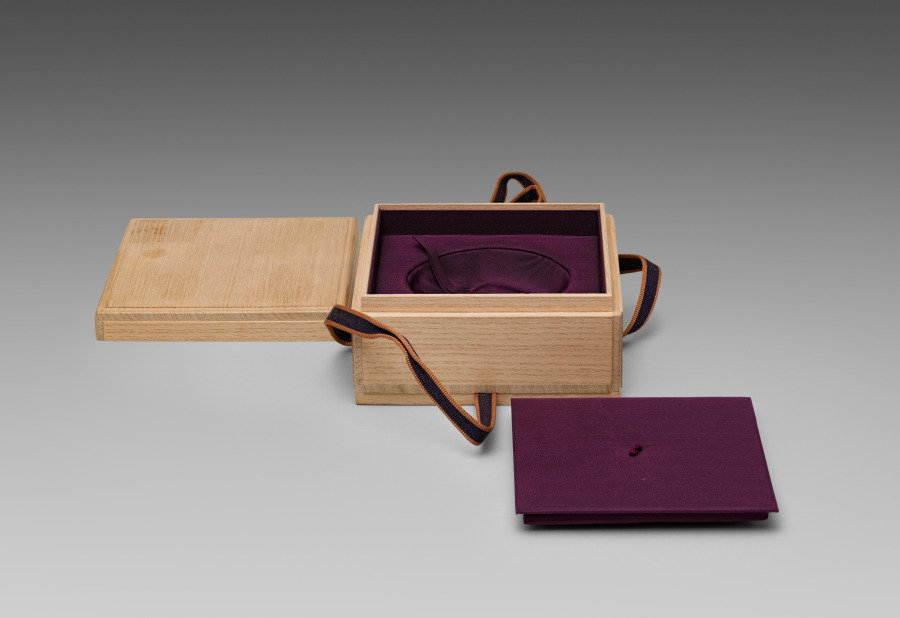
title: Celadon Dish with Molded Phoenix Design in the Shape of a Flower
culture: Korea, Goryeo dynasty (918–1392)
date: 1200s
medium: Celadon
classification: Ceramic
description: Celadon wares intended for everyday use—such as this dish—were among the most common burial objects placed in tombs during the Goryeo period (918–1392). Furnishing tombs with elaborate assemblages of objects was believed to honor the deceased and provide comfort in the afterlife. This dish, featuring the image of a flying phoenix, was likely a cherished possession that accompanied its owner to their final resting place.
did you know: The phoenix motif at the center of this dish symbolizes cosmic harmony and prosperity in traditional East Asian cultural and artistic expression.